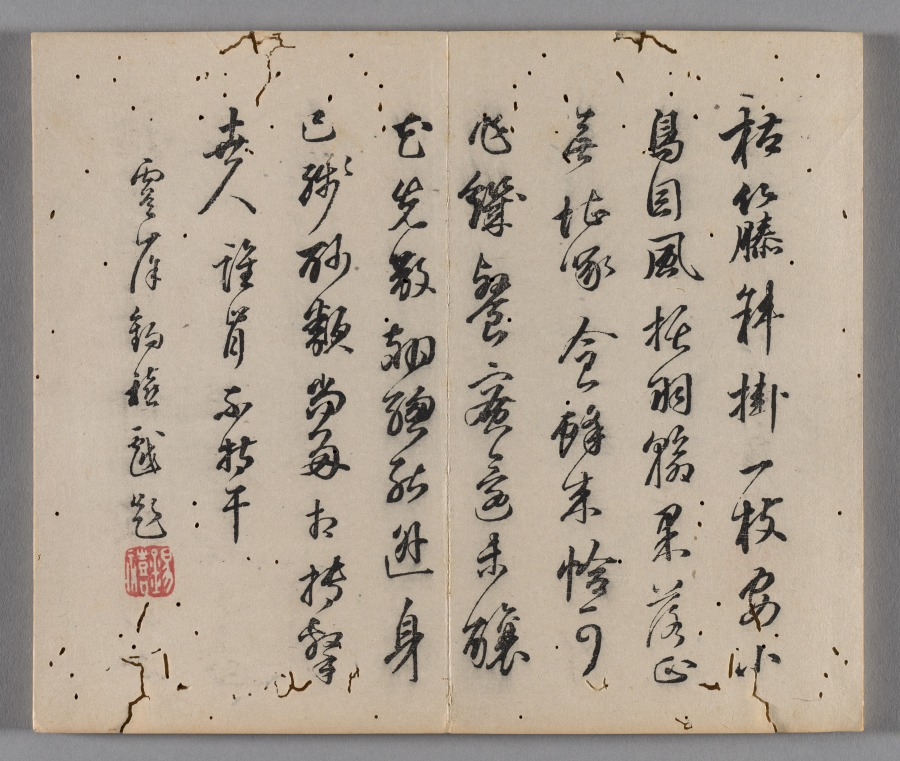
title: Ten Bamboo Studio Painting and Calligraphy Handbook (Shizhuzhai shuhua pu): Birds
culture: China, Qing dynasty (1644-1911)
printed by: Hu Zhengyan (Chinese, c. 1584–1674)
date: 1633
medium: Woodblock-printed book; ink and colors on paper; first edition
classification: Print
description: Color printing reached a level of perfection in the early 1600s, as seen in this Ten Bamboo Studio Collection of Calligraphy and Painting and the Mustard Seed Garden Manual of Painting (printed 1679 and 1701). The painterly quality, precision in registering (aligning) the woodblocks, and harmonious colors made them the most successful color print editions in Chinese history. Both editions were printed and compiled in Nanjing, spread nationwide, and had a great impact on the arts in Japan and Korea.